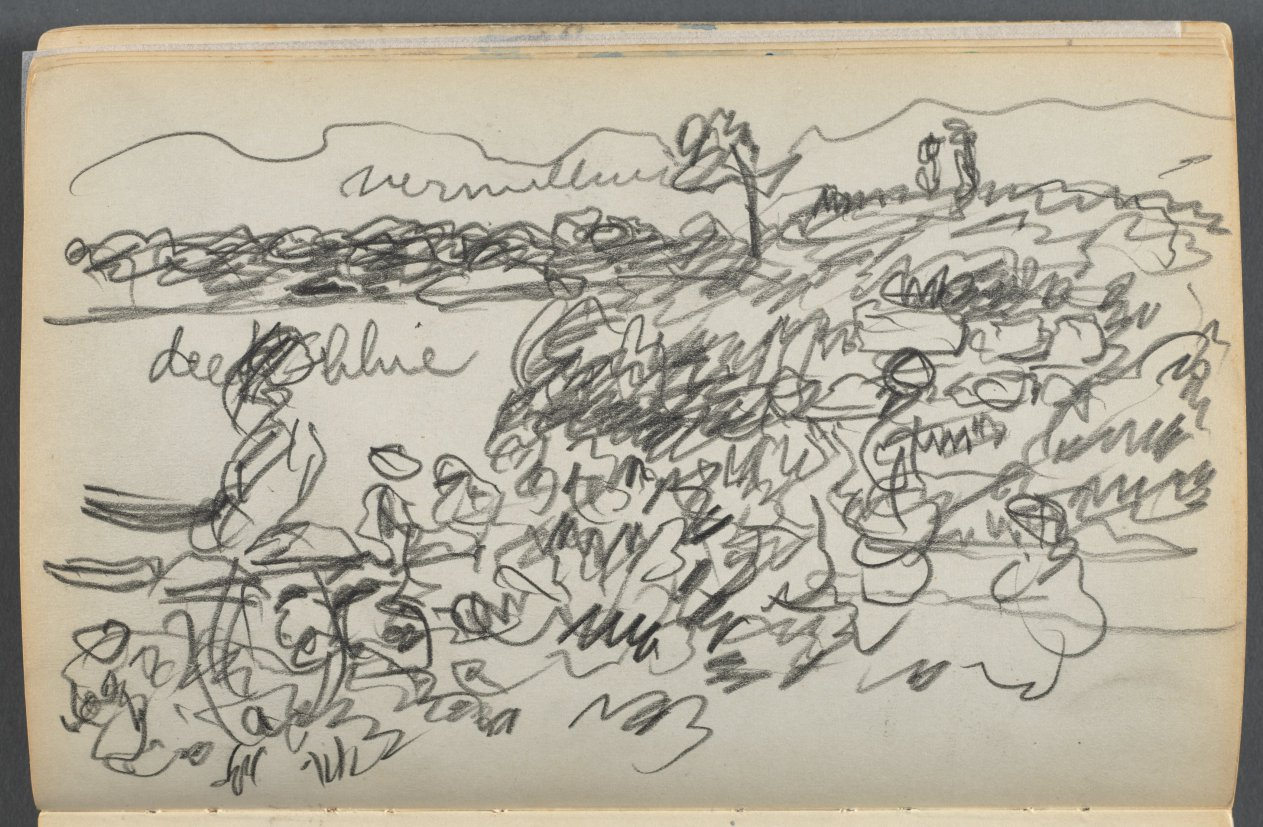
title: Sketchbook- The Granite Shore Hotel, Rockport, page 038: Harbor View with Color Notations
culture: America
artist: Maurice Prendergast (American, born Newfoundland [now Canada], 1858–1924)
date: 1905–10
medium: graphite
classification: Bound Volume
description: This sketchbook contains 72 pages of pencil drawings and 9 watercolors of Cape Ann. On the inside of the cover Prendergast wrote the address of the Granite Shore Hotel in Rockport, Massachusetts.